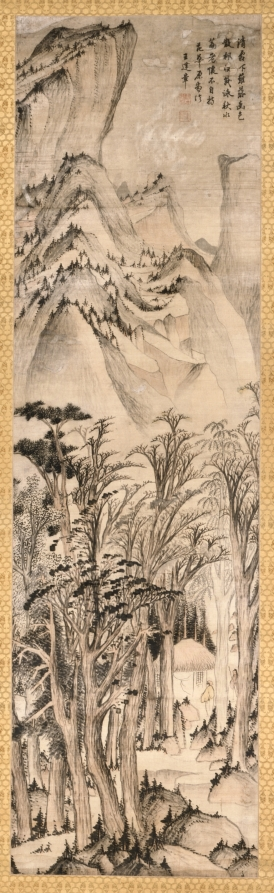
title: Solitary Colors of the Autumn Woods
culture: China, Ming dynasty (1368–1644)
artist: Wang Jianzhang (Chinese, active 1621–1662)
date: first half 1600s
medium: hanging scroll; ink and color on satin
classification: Painting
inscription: Artist's inscription, signature, and 2 seals: Cold frost falls on the fences,/ Solitary colors scatter the maples./ Reciting the chapter of "The Autumn Water,"/ I cannot still the emotion in my old heart. After the style of Fan Hua-yüan [Fan Kuan], Wang Chien-chang . [seals] Wang shih chih yin; Chien-chang. trans. LYSL/HK/WKH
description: Two gentlemen stand outside a thatched hut in a dense forest; some trees have bare branches indicating that the season is early autumn. Wang Jianzhang’s inscribed poem refers to a chapter called “Autumn Water” from Zhuangzi, a famous Daoist text written in the 3rd century BC: "Cold frost falls on the fences, / Solitary colors scatter the maples. / Reciting the chapter of “The Autumn Water,” / I cannot still the emotion in my old heart." Wang Jianzhang lived through the collapse of the Ming dynasty (1368–1644) and the rise of the Qing dynasty (1644–1911), when China was governed by the Manchus, an ethnic people from Manchuria who were traditionally viewed as “barbarians” by the Chinese. The poetic reference to Zhuangzi’s “Autumn Water” seems to discreetly convey Wang’s feelings about his country being taken over. “Autumn Water” was about learning to take steps in the foreign way, but not acquiring a foreign tongue. Perhaps Wang was lamenting his conflicted situation. For survival he had to adapt to the new political and social climate, while still trying to maintain his own identity and Chinese traditions.